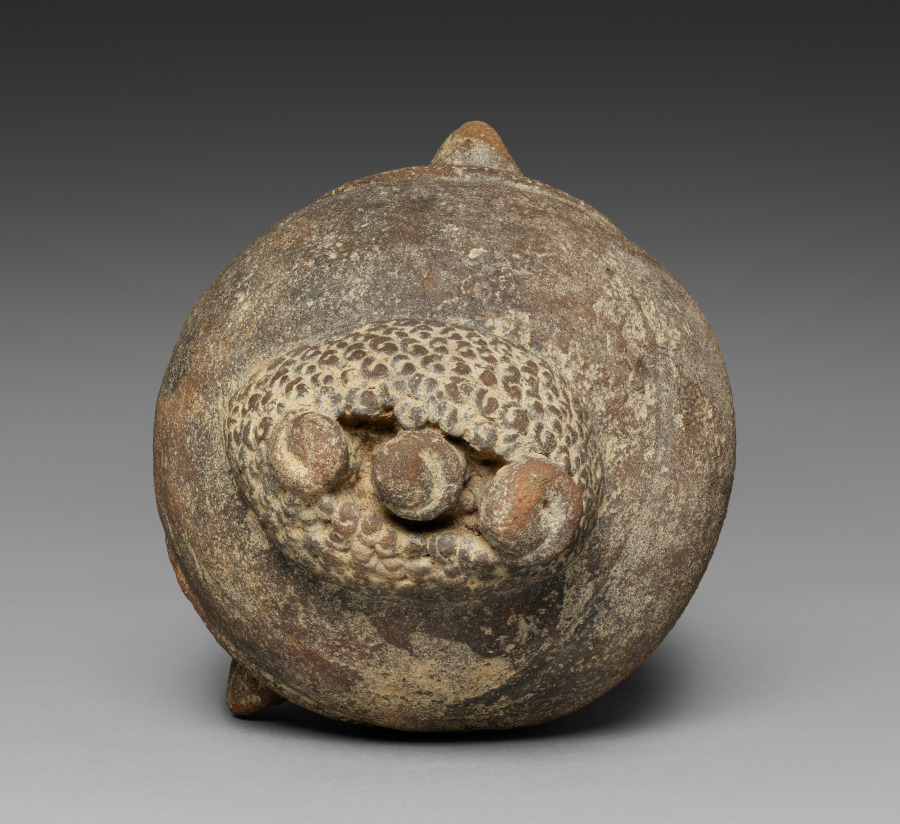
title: Memorial head (nsodie)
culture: Ghana, Akan-style sculpture, unknown female ceramicist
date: late 1600s–early 1700s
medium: Terracotta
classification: Sculpture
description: This is an idealized portrait of an Akan royal. The Akan states formed in West Africa around the 1400s. Akan royal family members commissioned terracotta portraits like this from female artists during someone’s life. Following their death and burial, the family placed these sculptures in a sacred grove. The woman who sculpted this head over 300 years ago worked from memory, without sketches. The resulting sculpture combined idealized physical qualities of elite figures with individual details. The hairstyle and skin color of this portrait reflect its subject’s individuality. In contrast, his calm expression reflects the desired “cool composure” of elites.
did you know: The woman who sculpted this head did so without making a sketch, working from her memory of the subject.